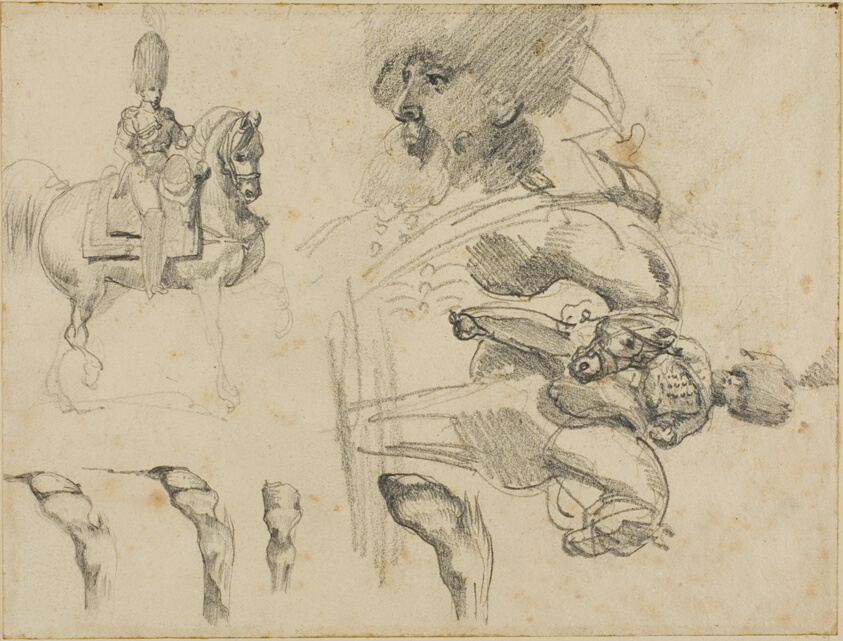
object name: Drawing and Watercolor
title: Sketches of Horses, Soldiers, and Hooves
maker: Jean Louis André Théodore Géricault (French, 1791-1824)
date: 1813/14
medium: Graphite on cream wove paper, perimeter mounted on cream wove paper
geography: France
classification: drawings (visual works); prints and drawing